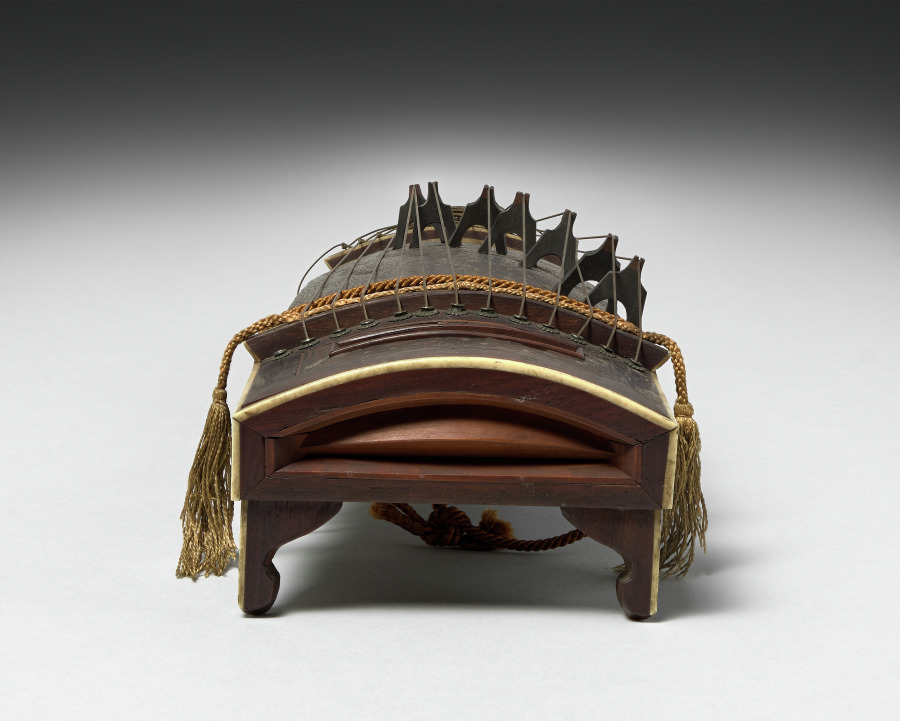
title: Koto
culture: Japan, Edo period (1615–1868)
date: early to mid-1800s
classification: Musical Instrument